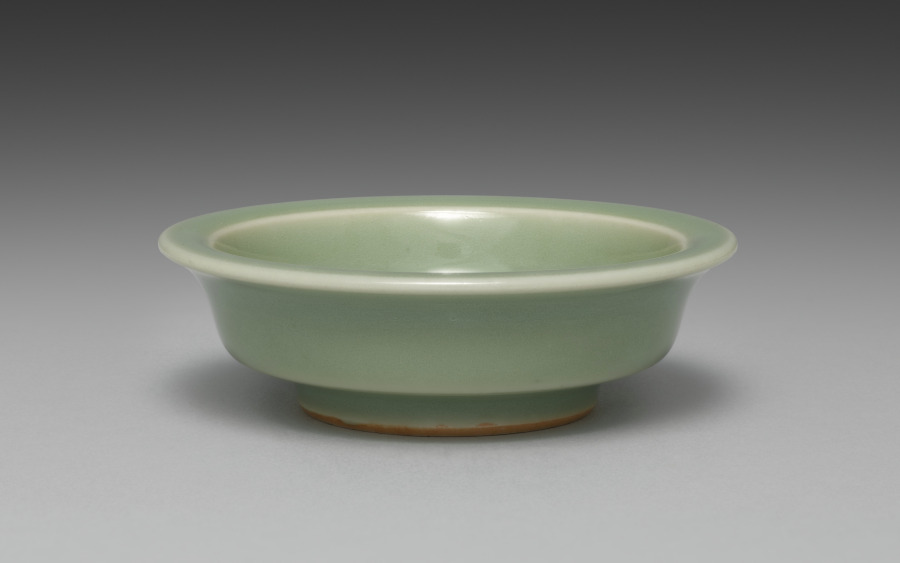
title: Saucer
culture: Japan, Meiji period (1868–1912)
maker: Seifū Yohei III (Japanese, 1851–1914)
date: 1893–1914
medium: One from a set of ten dishes; porcelain with green glaze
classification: Ceramic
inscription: 清風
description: Yohei III’s main output for his sophisticated clientele was in the form of tea sets and dining sets. He created a range of dishes in green glazes. He often produced in pairs, sets of five, or sets of ten. For this set of ten small dishes in a simple, round form that emphasizes the glaze above all, the box lid designates the piece as seiji, or green-glazed porcelain, using a general term for the extensive palette of green glazes often called celadon in English. The box lid further identifies the dishes themselves as tōchō, literally “bean-sized saucers,” a size that makes them suitable for dipping sauces.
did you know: The ten dishes in this set are stored in stacks of five in a two-compartment box.